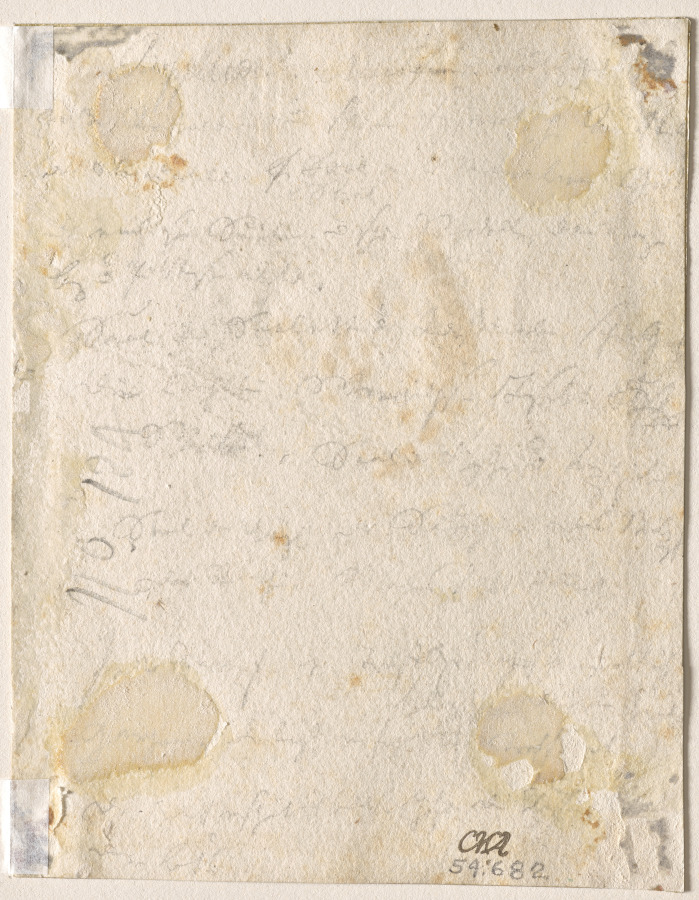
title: The Peasant Who Blew Hot and Cold (copy after Aegidius Sadeler)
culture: Germany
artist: after Aegidius Sadeler (Flemish, c. 1570–1629)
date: c. 1610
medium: pen and black ink and brush and gray wash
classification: Drawing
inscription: upper center, in black ink: Kalt und warm ist grü[illegible] mündt. / Redt [illegible] aüs [einem?] [soglünst?] ; SECONDARY SUPPORT, across bottom, in black ink: Rusticus en efflat frigus simul atque calorem. Ægid. Sadeler invenit. ; VERSO OF SECONDARY SUPPORT, upper center, in graphite: No. 124 ; over entire surface, in graphite: [14 lines in undetermined language]